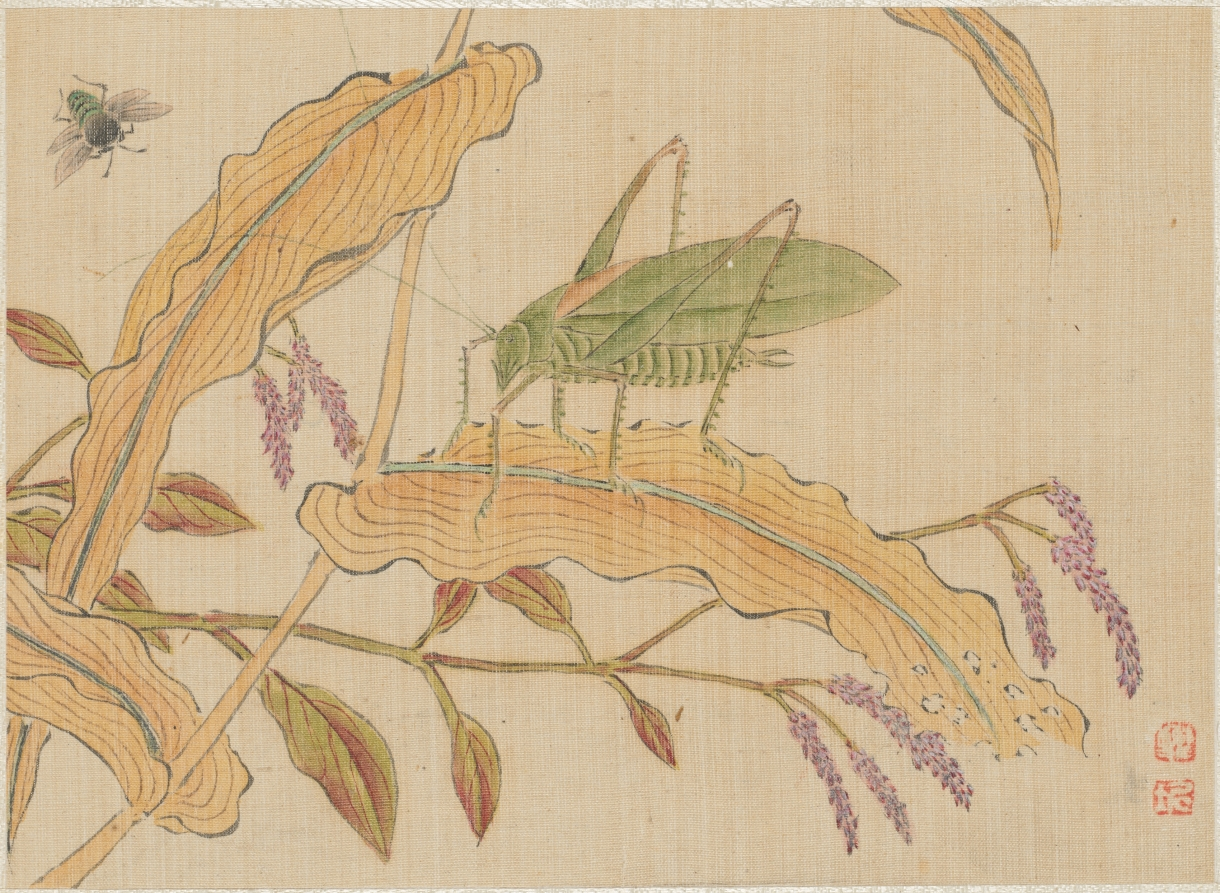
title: Album of Miscellaneous Subjects, Leaf 7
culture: China, Qing dynasty (1644-1911)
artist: Fan Qi (Chinese, 1616–after 1694)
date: early 1650s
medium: album leaf, ink and color on silk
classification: Painting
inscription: Artist seal: Fan Qi 樊圻. Poem by Han Tan 韓菼 (1637–1704): Thoughts of autumn in the nuptial chamber with the new chill arising,/ The white frost all pervasive with a bright moon shining./ Outside the window, a crisp wind conveys the sound of crickets./ Within this quiet dream, I seem to sense the fragrance of orchids.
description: Leaf 7 Han Tan's colophon reads: Thoughts of autumn in the nuptial chamber with the new chill arising, The white frost all persuasive with a bright moon shining. Outside the window, a crisp wind conveys the sound of crickets. Within this quiet dream, I seem to sense the fragrance of orchids.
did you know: The cricket stands on the yellowing leaf of a ripening rice plant.